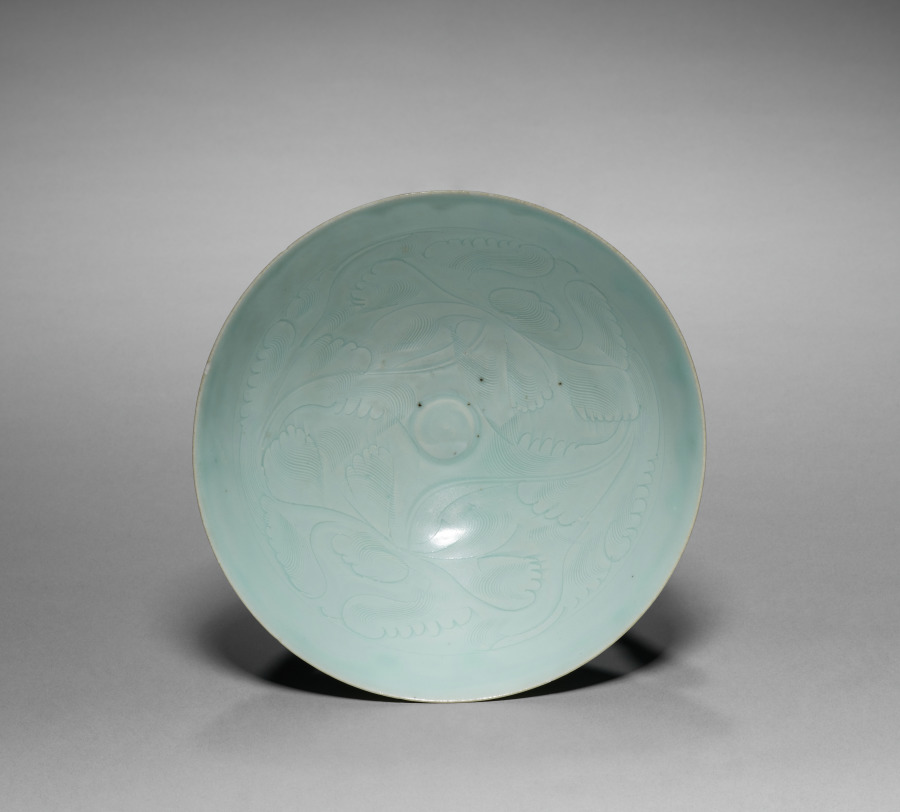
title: Bowl with Carved Design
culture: South China, Southern Song dynasty (1127–1279)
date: 1100s–1200s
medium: Porcelain with pale bluish-white (qingbai) glaze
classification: Ceramic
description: This conical bowl and the shallow and wide one (CMA 2020.183) are both hand-incised with decoration suggesting waves, clouds, or floral sprays. All of these motifs had auspicious meaning: waves and clouds bring rain that fertilizes the fields, and flowers and plants were often associated with the beauty of human virtues. The carved and combed designs were swiftly cut with a wooden tool into the unfired leather-hard body before glazing. Once the glaze was applied, it pooled in the incised areas rendering the design more visible.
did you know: Never intended for imperial use, qingbai ware was among the first mass-produced porcelain types and became a popular export.